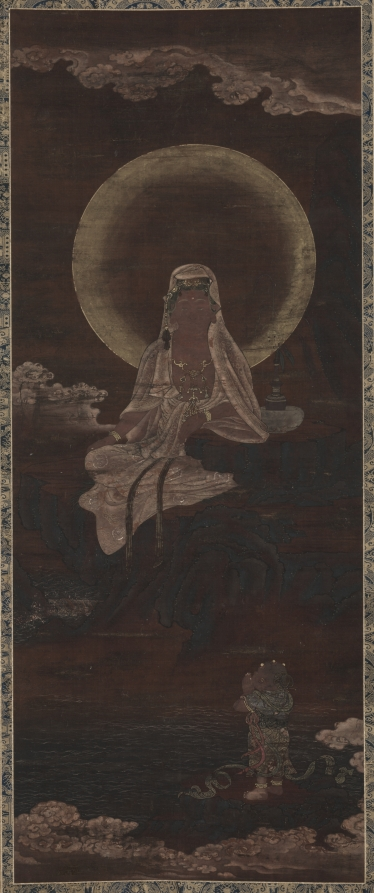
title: Water-Moon Kannon (Suigetsu Kannon)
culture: Japan, Meiji period (1868–1912)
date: 1868–1912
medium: hanging scroll, ink, gold, silver, color, and cut gold-leaf on silk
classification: Painting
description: Kannon represents a primary figure of benevolence and compassion in the Buddhist pantheon. Identified early in Buddhist texts as a close attendant to the Buddha, by the 700s Kannon's popularity soared to such an extent in China, Korea, and Japan that the bodhisattva was often worshipped independently. Here at the lower left, Kannon is depicted with the child Zenzai Dōji (Sakskrit: Sudhana), a wealthy boy who, according to the final chapter of the Flower Garland Sutra, visited Kannon's abode Fudaraka (Sanskrit: Potalaka) during a long journey to learn the bodhisattva path.